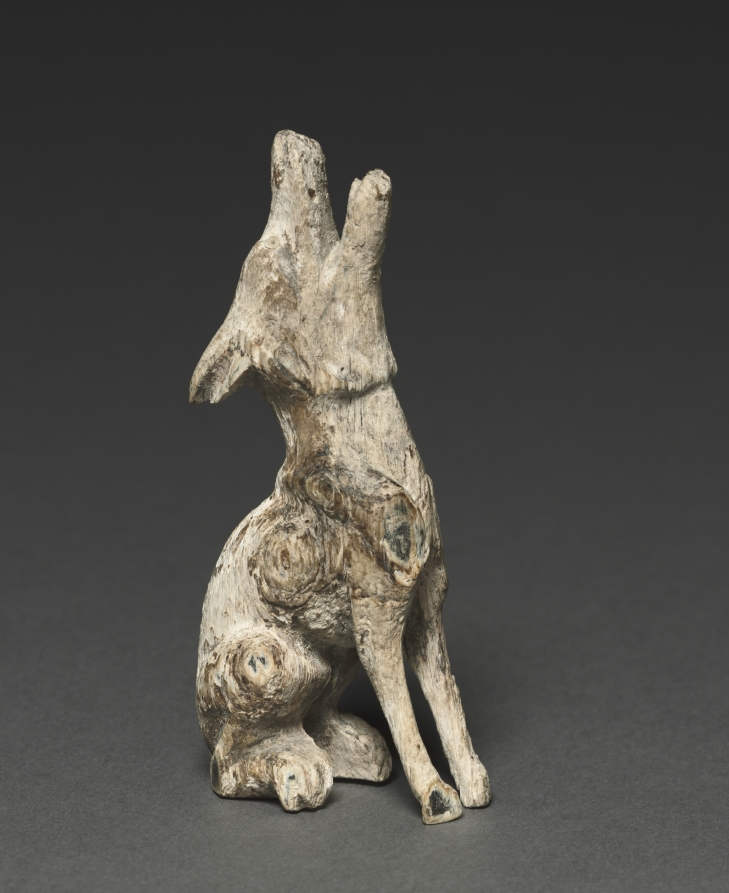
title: Howling Wolf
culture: Southern Siberia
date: c. 500–200 BCE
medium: wood with shell inlays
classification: Wood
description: Its subject, size, materials, and naturalistic style suggest that this small sculpture was made by one of the nomadic peoples of Western and Central Asia—perhaps the Scythians, who, with the Medes, conquered the Assyrians. Works of art made by the Scythians and other nomadic groups are shown on the northwest wall of this gallery.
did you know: The artist captured this wolf in mid-howl, depicting a wild animal in its natural element. The naturalistic carving of the wood depicts the animal's features, making it recognizable despite the eroded surface.